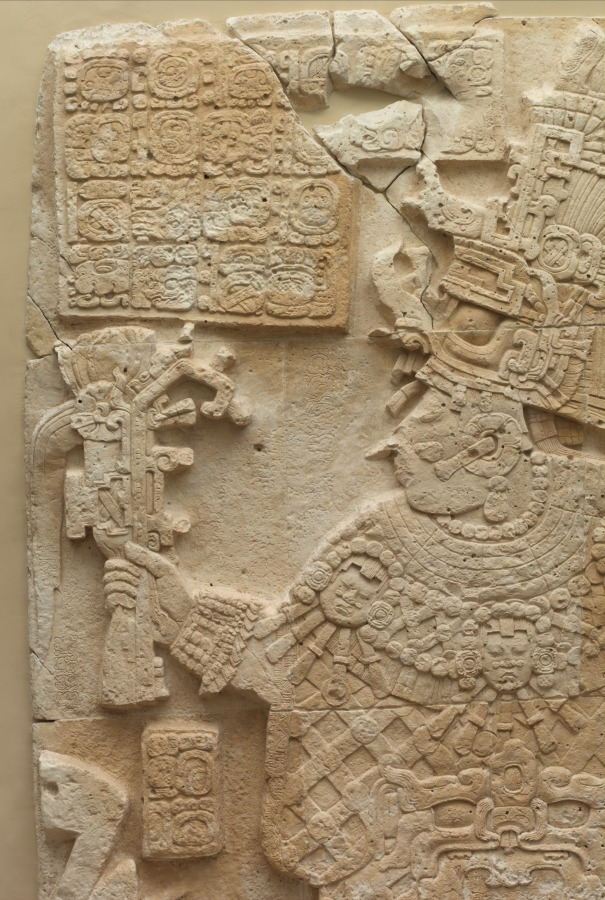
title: Front Face of a Stela (Free-standing Stone with Relief)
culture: Mesoamerica, Guatemala, Department of the Petén, El Perú (also known as Waka'), Maya (250-900), Classic period (200-1000)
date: 692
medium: limestone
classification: Sculpture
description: In stone sculpture, Maya rulers celebrated the milestones of their reigns with flamboyant portraits like this image of a royal woman, created to mark the passage of a twenty-year period known as the k’atun. She originally stood in a plaza next to a portrait of her spouse (see photo), with whom she ruled El Perú-Waka’, a provincial Maya town. A member of the powerful dynasty of a nearby Maya center, she seems to have held higher authority than her husband, serving as a military governor. Her costume reflects her status: the headdress has a fan of green quetzal feathers and her jewelry probably refers to jade-both among the most prized of ancient materials. Jade beads also may form the net over her garment, belted with the head of a fish-like creature. Completing the costume are the scepter and shield she grasps in her hands. The dwarf at her side may be a court attendant. The hieroglyphic text refers to important dynastic dates.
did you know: The powerful Maya queen shown on this stela is known as Lady K’abel.